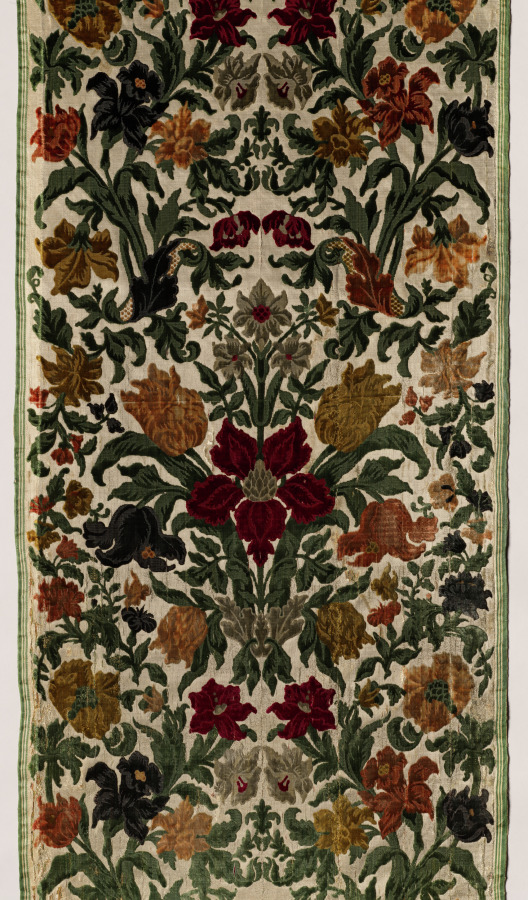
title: Length of Floral Velvet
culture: Italy, Genoa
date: 1600s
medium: velvet (cut, uncut, voided); silk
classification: Velvet